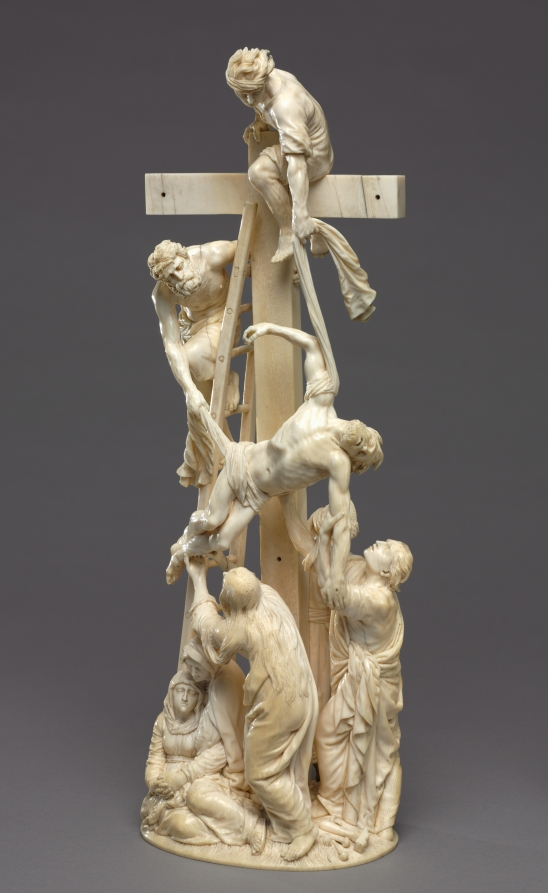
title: Descent from the Cross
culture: Austria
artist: Adam Lenckhardt (German, 1610–1661)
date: 1653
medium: ivory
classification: Sculpture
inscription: inscribed with monogram "AL" conjoined and dated 1653.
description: Carved from a single piece of ivory for Prince Karl Eusebius von Liechtenstein of Vienna, this work is a true tour-de-force. It took Lenckhardt seven years to complete; it is his last known sculpture and the pinnacle of his career. The biblical accounts of the descent from the cross found in the gospels are not consistent, which may contribute to the difficulty in precisely identifying the figures. The Virgin Mary, Saint John, Mary Magdalene, and others were said to be present, but undoubtedly there are other disciples here mourning Christ’s death. The intense emotion registers on the faces of the figures in the scrupulous and exquisitely detailed work.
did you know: Carved from a single elephant tusk, the artist took special care to ensure the ivory did not crack or break as he meticulously crafted each figure in this visually exciting sculpture. Look closely to find tools and small objects included near its base.